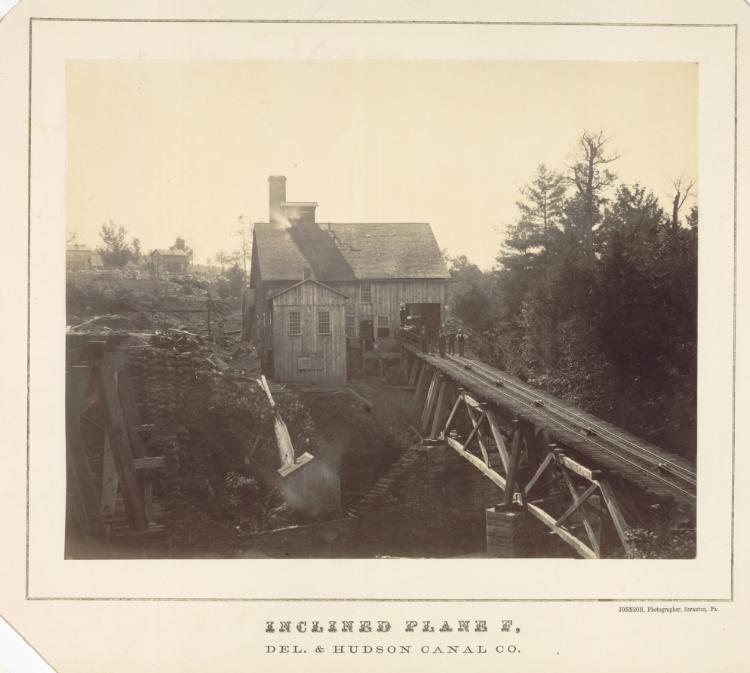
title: Inclined Plane F, Delaware and Hudson Canal Co.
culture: America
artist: Thomas H. Johnson (American, c. 1821-)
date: c. 1860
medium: albumen print from wet collodion negative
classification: Photograph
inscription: imprinted in black type on recto of mount; "INCLINED PLANE F, / DEL. AND HUDSON CANAL CO." "Johnson, Photographer, Scranton, Pa"; written in pencil: "N 1336"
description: This engaging industrial scene is from a small, rare group of large-format photographs taken in the eastern United States during the Civil War era. Thomas H. Johnson operated a studio in Scranton, Pennsylvania, from 1861 until at least 1865. He made a series of images documenting the Delaware & Hudson Canal and Gravity Railroad operations—primarily views of the Gravity Railroad's route through northeastern Pennsylvania. For this image, one of only a few the photographer made of inclined tracks, company employees stood on the railroad ties while Johnson set up his camera, coated, and then exposed his large glass negative in the early morning light. Seen from afar, the unidentified men provide a sense of scale for the large building and the expansive landscape in which the facility was located.